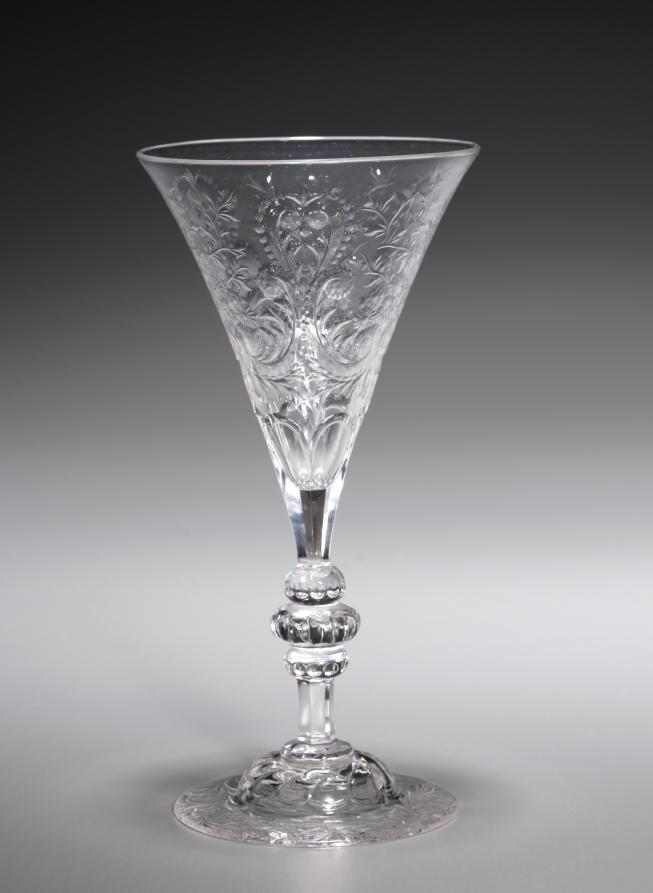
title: Glass from a Place Setting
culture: probably America, late 19th-early 20th century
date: c. 1890–1920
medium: glass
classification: Glass